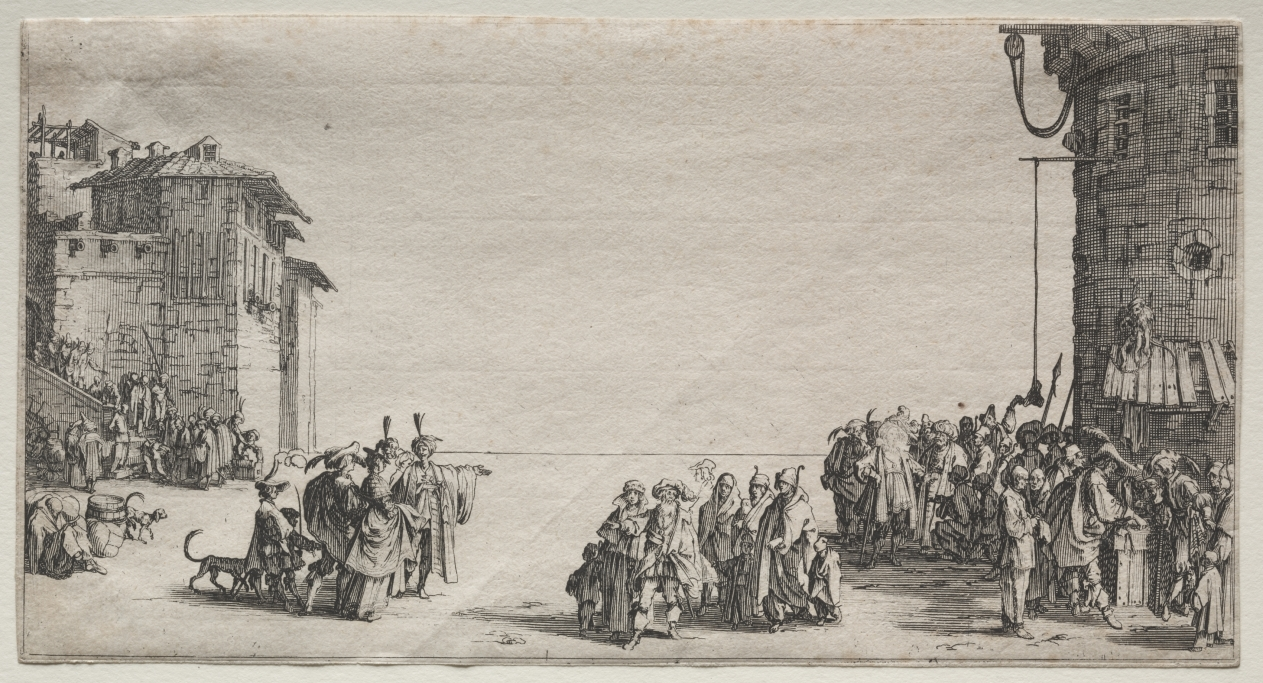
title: The Slave Market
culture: France, 17th century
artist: Jacques Callot (French, 1592–1635)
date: 1629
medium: etching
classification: Print